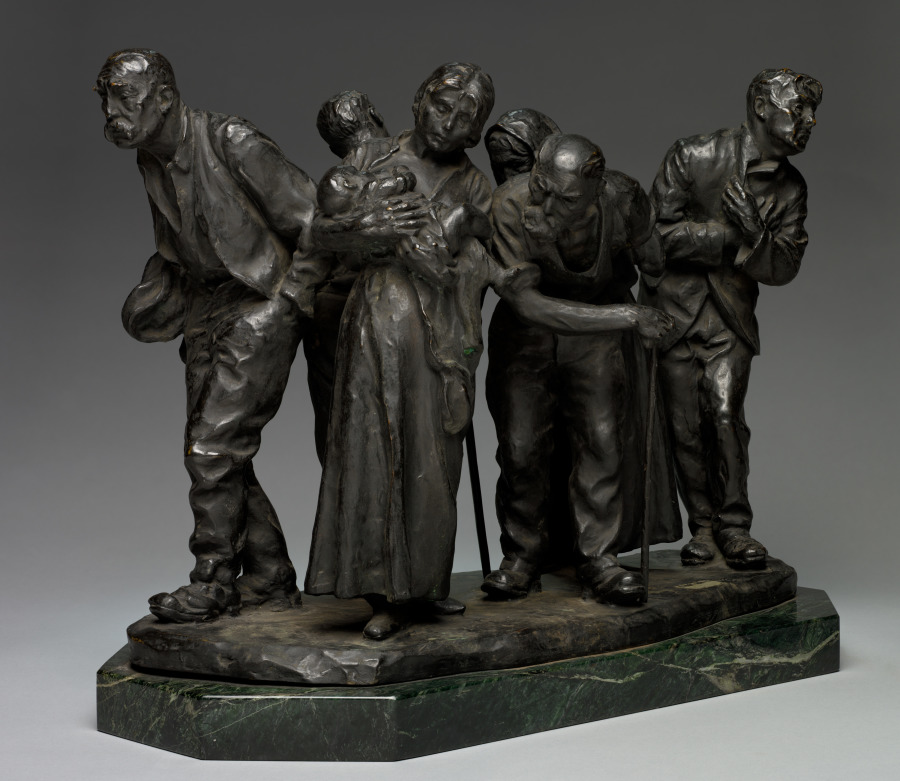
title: The Bread Line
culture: America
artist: Max Kalish (American, born Russian Empire [now Lithuania], 1891–1945)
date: 1926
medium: bronze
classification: Sculpture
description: Sculptor Max Kalish described his motivation behind creating The Bread Line: "My interest in making this group came to me gradually through years of concern with the question of unemployment and poverty." The sculpture's six figures were modeled separately, then arranged together to make the final composition.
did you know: The artist is buried in Mayfield Cemetery, Cleveland.